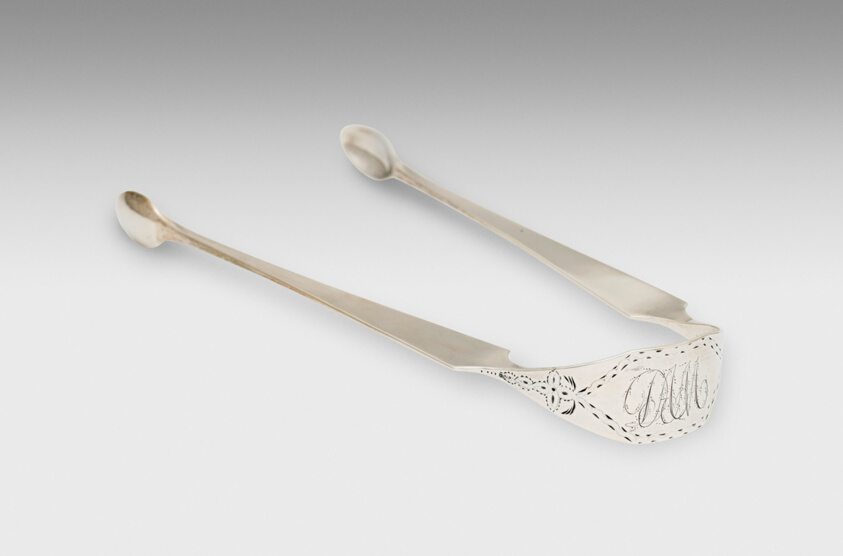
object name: Metalwork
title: Tongs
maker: John Murdock; American, 1748–1786; Philadelphia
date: 1779–86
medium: Silver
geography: Philadelphia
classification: utensil for serving food; silver; utensil; american decorative arts; american arts; decorative arts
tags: dining, drinking